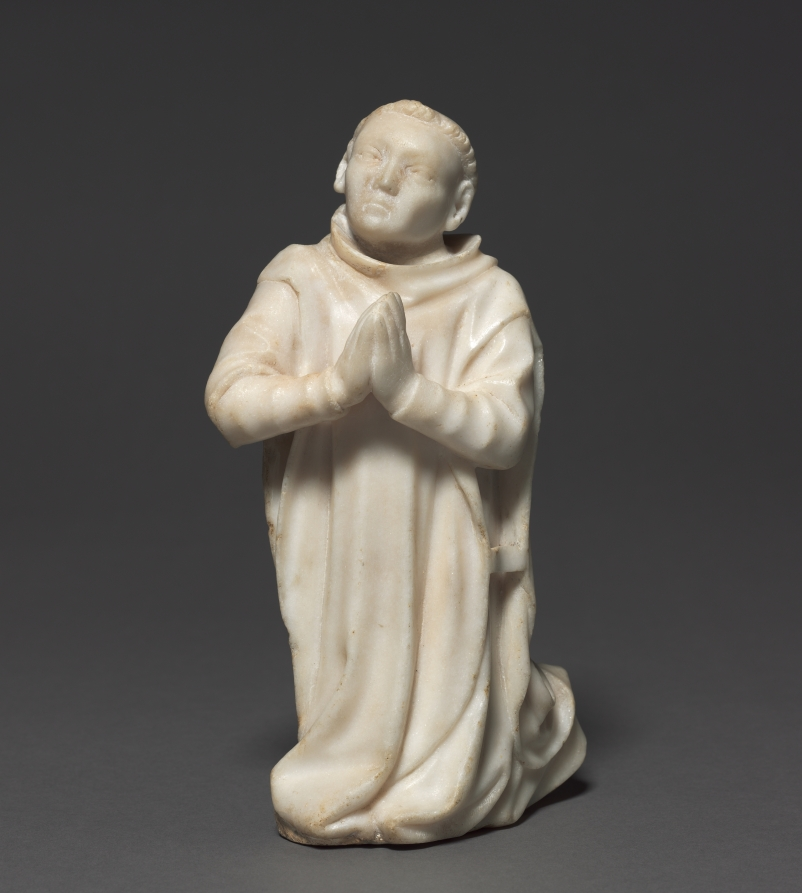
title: Kneeling Carthusian Monk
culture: France, Burgundy, Dijon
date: c. 1380–1400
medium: marble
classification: Sculpture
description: These are the only known surviving sculpted examples of kneeling Carthusian monks. These two figures would have formed part of a private devotional group, probably in a monk’s cell, with a sculpture of the crucified Christ or the Virgin positioned between them. They wear the recognizable white scapular, a hooded garment with front and back panels tied together with a tab.